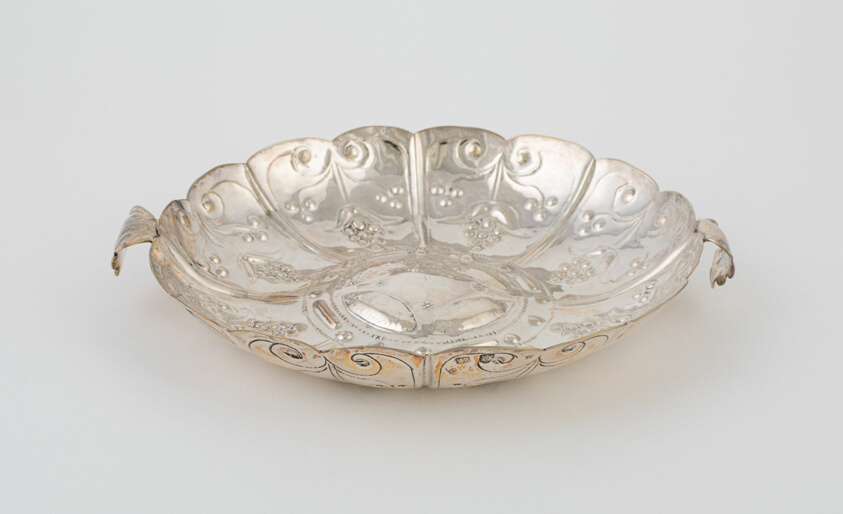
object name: Metalwork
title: Sweetmeat Dish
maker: London, England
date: 1631/32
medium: Silver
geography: England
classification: dish (vessel); silver; metalwork; european decorative arts